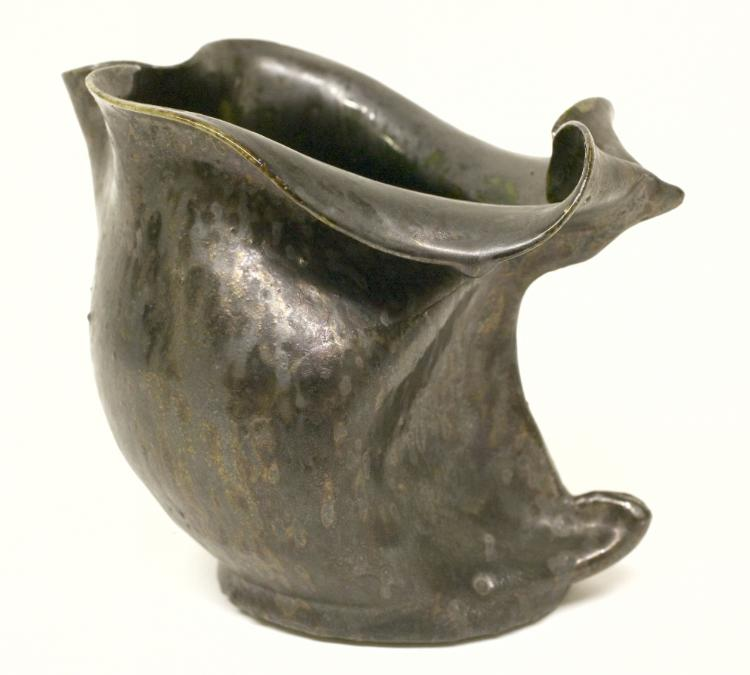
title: Pitcher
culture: America, early 20th Century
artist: George E. Ohr (American, 1857–1918)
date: c. 1900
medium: stoneware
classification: Ceramic